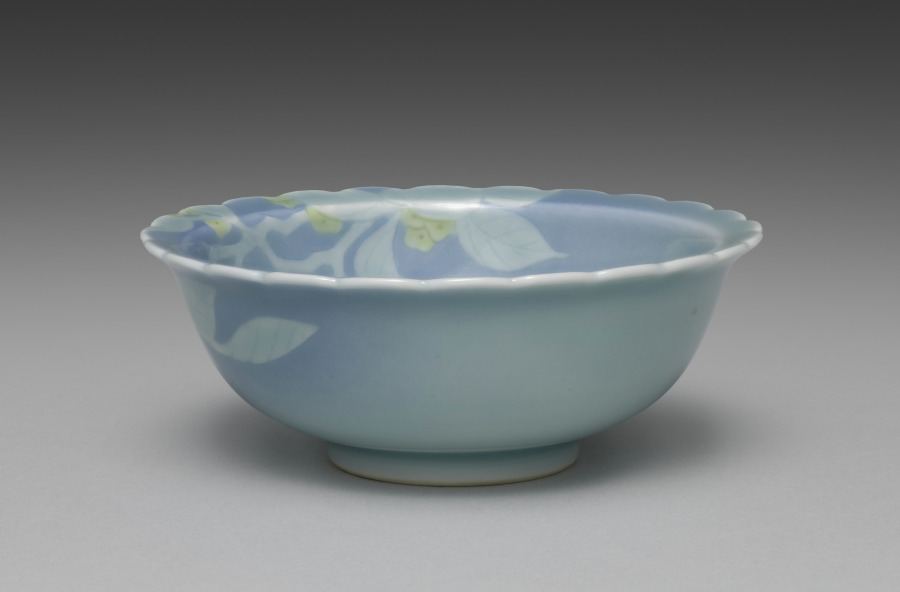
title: Dish from Dishes with Flowers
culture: Japan, Taishō period (1912–26) or Shōwa period (1926–89)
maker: Seifū Yohei IV (Japanese, 1872–1951)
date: 1914–46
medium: One from a set of five dishes; porcelain with underglaze yellow and blue glaze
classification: Ceramic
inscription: 清風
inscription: 清風造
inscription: 成山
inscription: 清風盧人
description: One can imagine a cool summer breeze when looking at this set of dishes, each shaped with a crenulated mouth and glazed with blue. Around the rim and into the basin, the bowls have low-relief designs of flowers with underglaze yellow petals; their leaves and stems show white through the glaze. On each dish, the design continues over the rim onto one side.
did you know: Seifū Yohei IV’s dishes with flowers feature underglaze yellow.